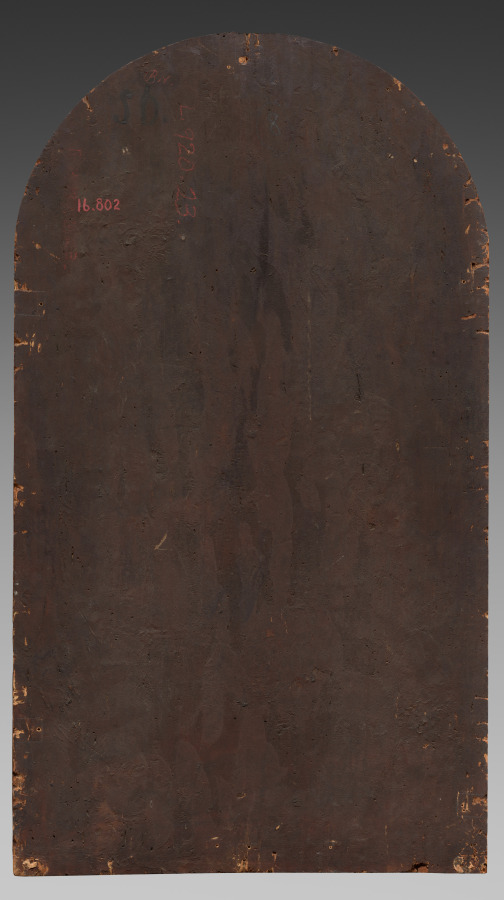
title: Virgin and Child with Angels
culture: Italy, Florence, 15th century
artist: follower of Fra Filippo Lippi (Italian, c. 1406–1469)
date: c. 1460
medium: tempera and gold on wood panel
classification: Painting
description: This painting, produced by one of Fra Filippo Lippi’s many imitators in the city of Florence, is very close to the composition of the now lost central panel of the triptych commissioned by the Medici family in 1457. It was purchased by Mrs. L. E. Holden before the museum’s acquisition of the two flanking panels of Saint Anthony Abbot and Saint Michael. It has been suggested that this painting is a copy of the original lost central panel of Fra Filippo’s triptych of 1457.